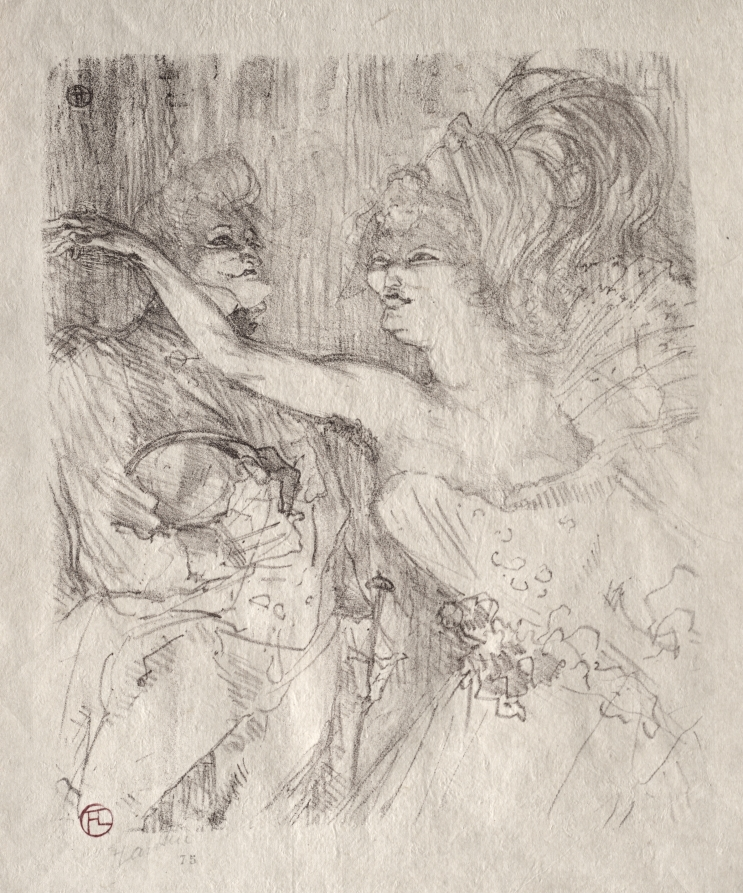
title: Guy and Mealy, in "Paris qui Marche"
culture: France, 19th century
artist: Henri de Toulouse-Lautrec (French, 1864–1901)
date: 1898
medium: lithograph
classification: Print